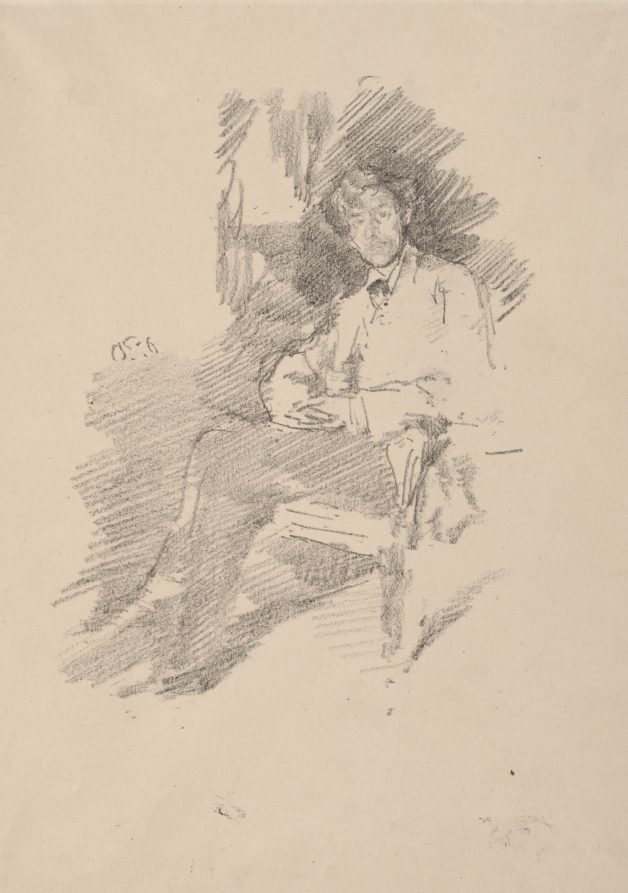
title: Walter Sickert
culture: America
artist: James McNeill Whistler (American, 1834–1903)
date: 1895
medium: lithograph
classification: Print